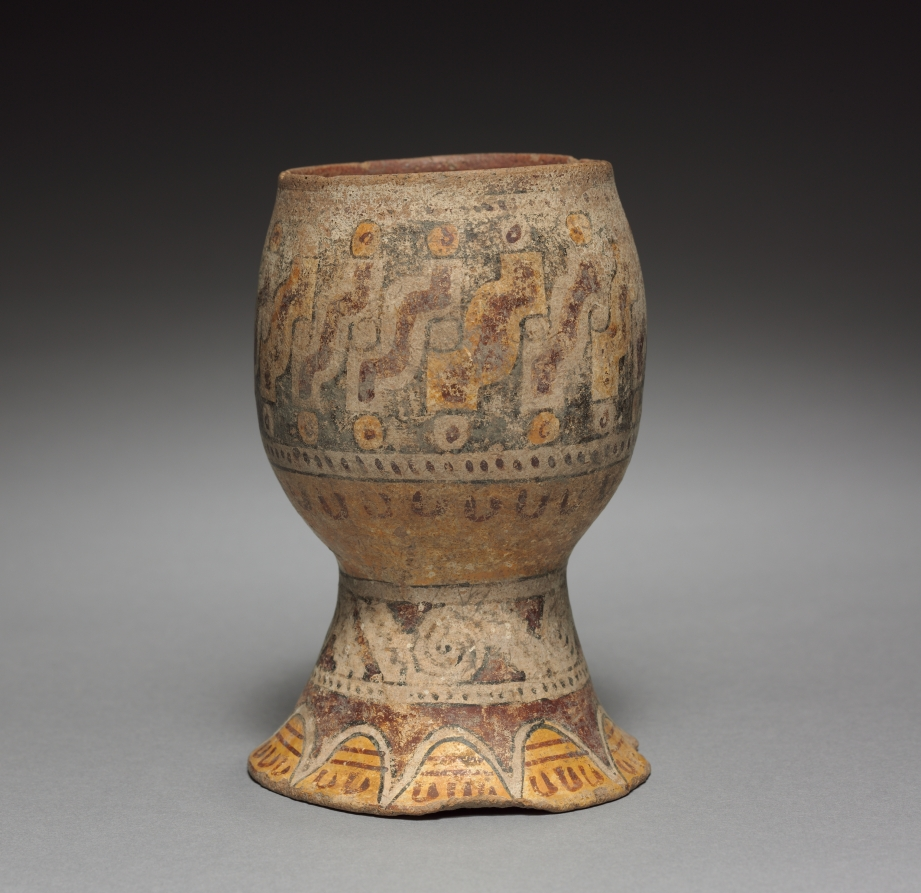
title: Drinking Cup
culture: Mexico, Cholula(?), Mixteca-Puebla style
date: 900–1519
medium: pottery with burnished, colored slips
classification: Sculpture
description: After about the year 800, several Mixtec kingdoms developed in the regions known today as Oaxaca and Puebla in southern Mexico. Mixtec artists excelled in creating small-scale, fine works of art, including polychrome pottery. A Mixtec noble may have used this well-painted goblet to drink chocolate or pulque, a fermented beverage made from the sap of the maguey cactus.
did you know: Pulque, once the drink of gods and rulers, is now available in a can.